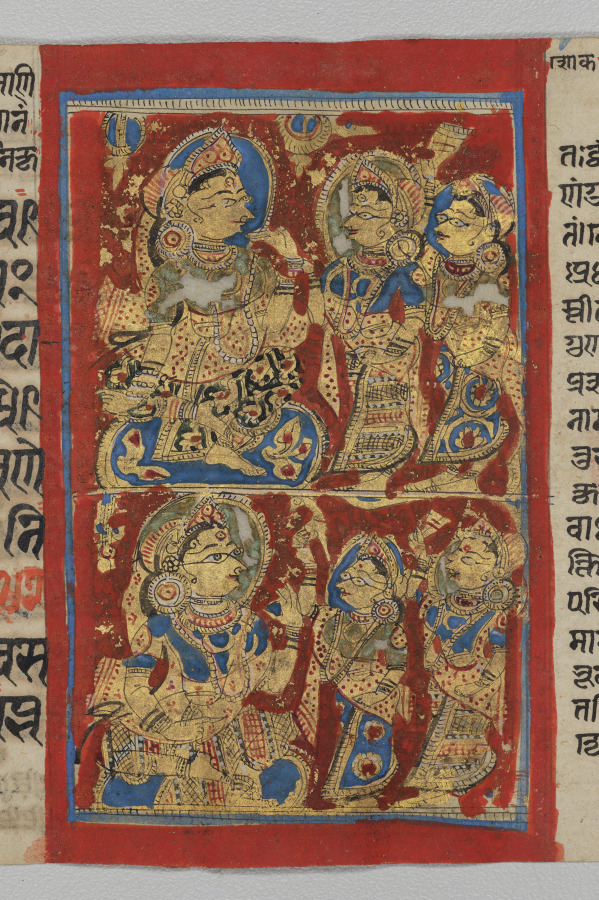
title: Queen Trishala's Grief and Happiness, Folio 29 (recto), from a Kalpa-sutra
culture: Western India, Gujarat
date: c. 1475–1500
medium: Gum tempera, ink, and gold on paper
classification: Painting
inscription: [[upper right]] śoka/harśa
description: This page discusses the pregnancy of Queen Trishala when she was anxious about why she could not feel the baby move. In the painting she addresses her handmaids: “Has the child in my womb been destroyed? Has he been killed? Have I suffered a miscarriage? The child used to move, but now he does not move.” The baby is Mahavira, who will grow to be the historical founder of the Jain religion. According to the text, he remained motionless out of compassion for his mother, not wishing to disturb her. Once he realized how worried she was, he made a little movement, and this filled her with joy.